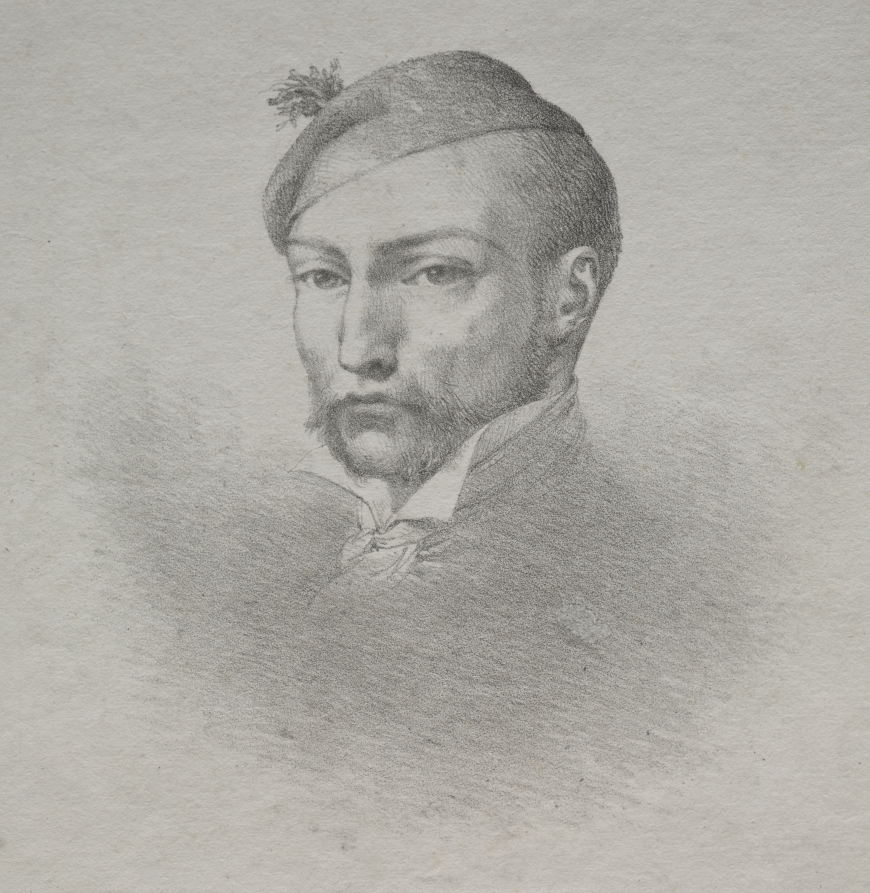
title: Théodore Géricault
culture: France, 19th century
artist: Léon Cogniet (French, 1794–1880)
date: c. 1824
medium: lithograph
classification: Print